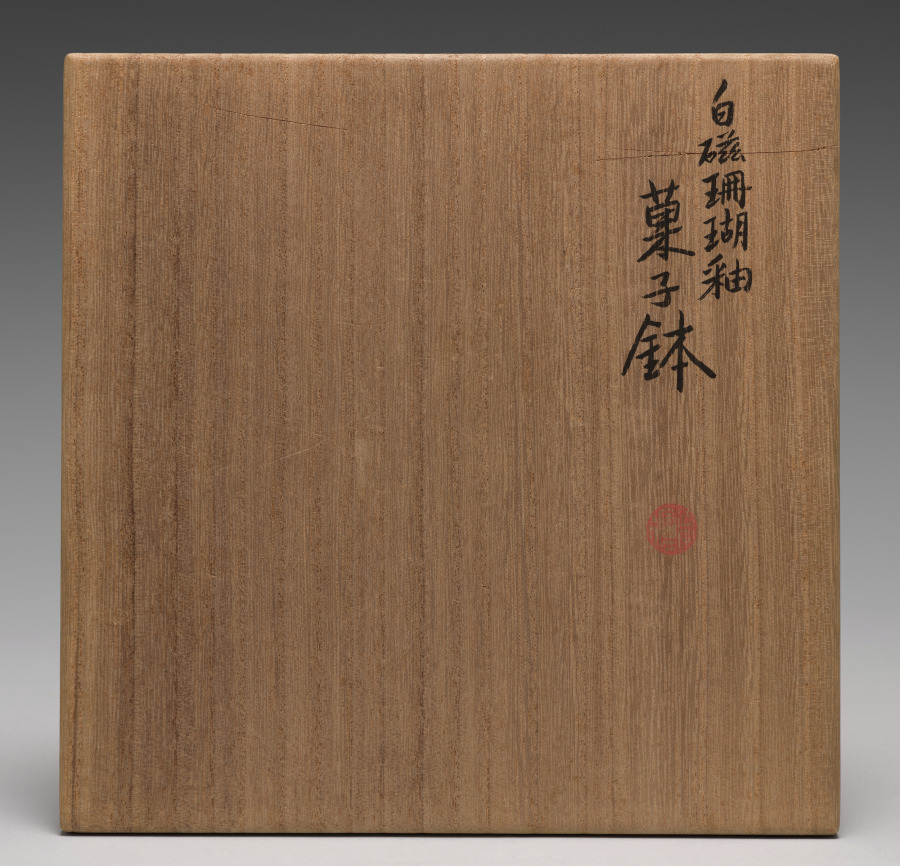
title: Sweets Bowl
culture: Japan, Taishō period (1912–26) or Shōwa period (1926–89)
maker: Seifū Yohei IV (Japanese, 1872–1951)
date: 1914–46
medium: Porcelain with coral red glaze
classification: Ceramic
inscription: 清風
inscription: 成山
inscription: 清風造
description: Like his father, Yohei IV also produced works with red monochrome glazes, like this red coral–glazed sweets bowl with white interior.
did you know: Seifū Yohei IV was active at home and abroad and won international recognition for his ceramic's glazes and designs.